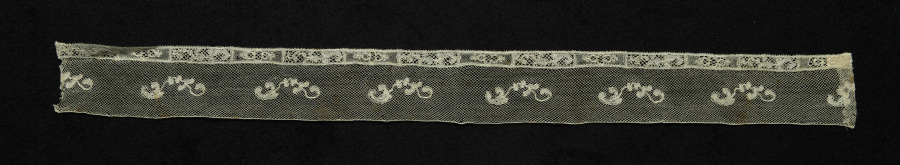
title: Lace Edging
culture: Belgium, Mechelen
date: 1780–99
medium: Silk: bobbin lace (with Mechelen cordonnet)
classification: Lace